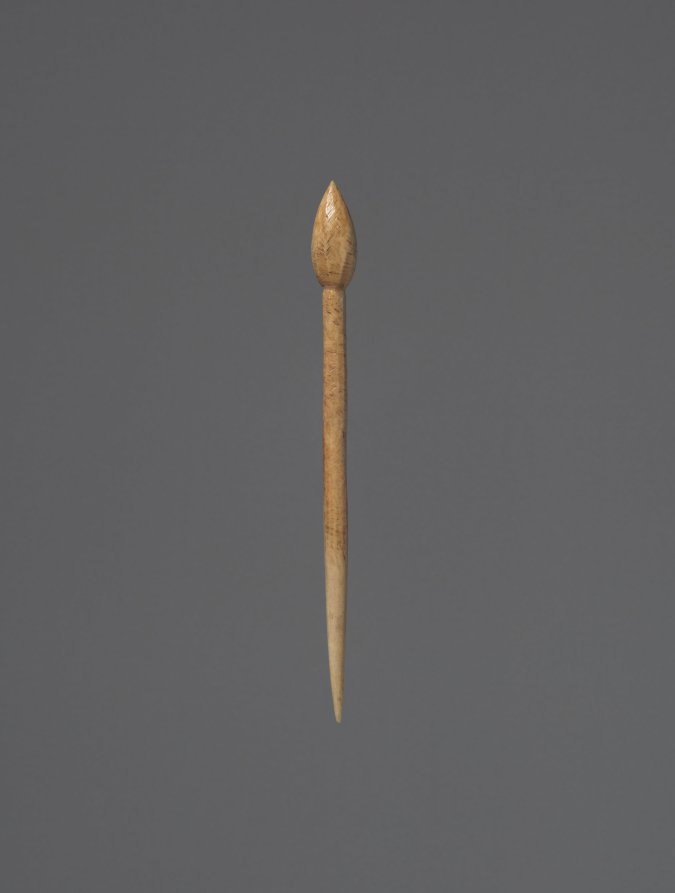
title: Hairpin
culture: Greece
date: 400s BCE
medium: ivory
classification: Ivory